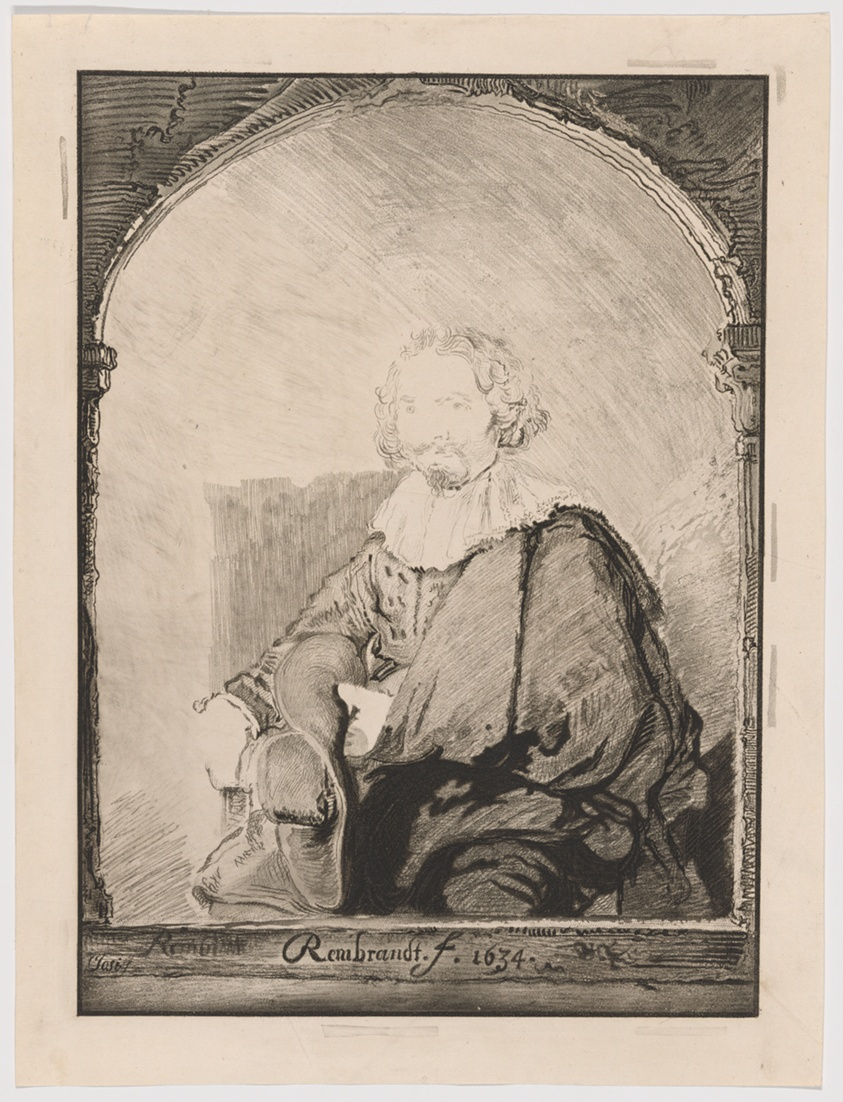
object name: Print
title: Portrait of a Man in an Armchair, from Collection d'imitations de Dessins d'après les Principaux Maîtres Hollandais et Flamands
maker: Christian Josi (Dutch, died 1828); after Rembrandt van Rijn (Dutch, 1606-1669)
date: 1826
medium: Soft ground etching, aquatint, and roulette, with touches of drypoint, printed in black on white laid paper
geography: Holland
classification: etching; print; prints and drawing